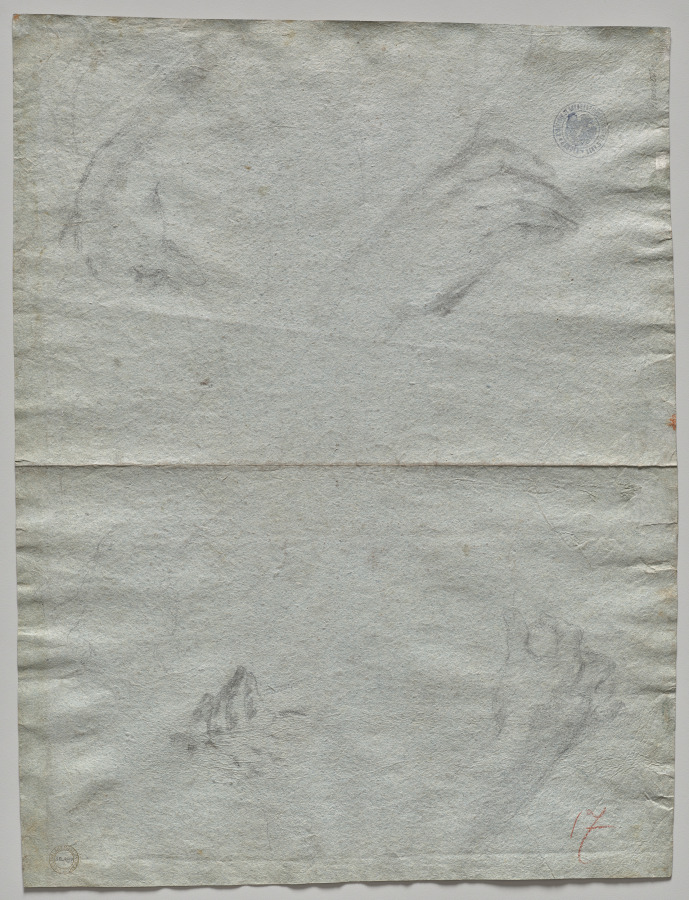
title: Studies of Hands Playing Instruments (verso)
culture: Italy, Venice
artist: Giovanni Battista Piazzetta (Italian, 1682–1754)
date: 1723–27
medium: black chalk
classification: Drawing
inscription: lower left, in red chalk: 17 [sideways] ; lower right, in graphite: Piazzetta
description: This drawing was completed in preparation for the most prestigious religious commission of Giovanni Battista Piazzetta’s career, the ceiling painting of the Glory of St. Dominic for the church of SS. Giovanni e Paolo in Venice. Both the finished painting, which depicts St. Dominic’s arrival in heaven amid a thundery vortex, and Piazzetta’s study for the angel, who carries St. Dominic on a cloud, depart from Venetian tradition. To execute this airborne subject, he likely drew from wax or clay models suspended in midair in order to study the illusionistic di sotto in su (from below to above) perspective and the play of light found on the angel’s shadowed form. He worked out the angel’s twisting pose, imbuing it with a lively sense of movement, and accentuated the drapery’s folds with heavy lines as though considering their visibility from afar. There are only slight changes in the angel’s pose between this drawing and the completed painting. As few of Piazzetta’s preparatory studies for paintings exist, Cleveland’s sheet offers rare insight to the artist’s working methods.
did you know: The Venetian blue paper (carta azzurra) of this sheet was the preferred medium for preparatory drawings among artists in Venice at the time this drawing was made.